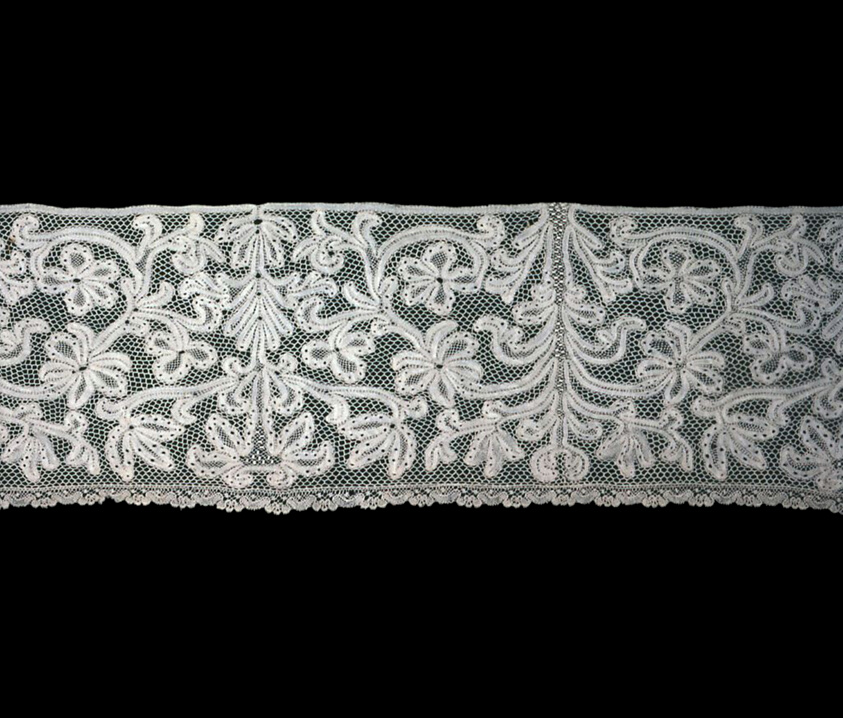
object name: Textile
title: Flounce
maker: Probably Northern Italy or Hungary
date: 1701/50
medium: Linen, bobbin part lace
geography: Italy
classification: textile; lace - bobbin